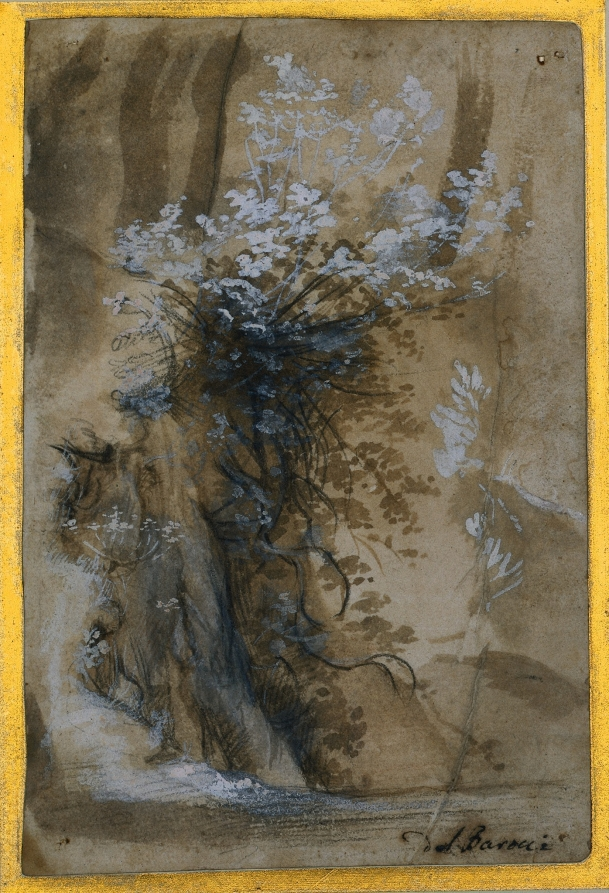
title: Flowering Bush above an Eroded Bank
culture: Italy, 16th century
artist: Federico Barocci (Italian, 1528–1612)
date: c. 1572–1604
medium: black chalk, brush and brown wash, and lead white (partially oxidized), with traces of red chalk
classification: Drawing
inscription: lower right, in brown ink: del Barocci ; VERSO, across top, in brown ink: Originale del Barocci ; lower right, in graphite: D217EHLX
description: Federico Barocci, who worked in Urbino, made landscape sketches for use in his paintings and as independent studies. The artist’s multimedia approach—combining chalks, ink washes, and opaque paints—was novel at the time but would become standard practice for landscape artists working in later centuries. Novel, as well, was his interest in excerpts of the natural world rather than fully realized scenes. Here, the artist drew an eroded bank with a few bold lines in black chalk, then used a brush to layer brown and white ink washes, capturing the untamed clump of earth with remarkable naturalism.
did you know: This drawing is believed to have once been in the collection of two brothers who were considered the premier academic painters in 19th-century Rome.